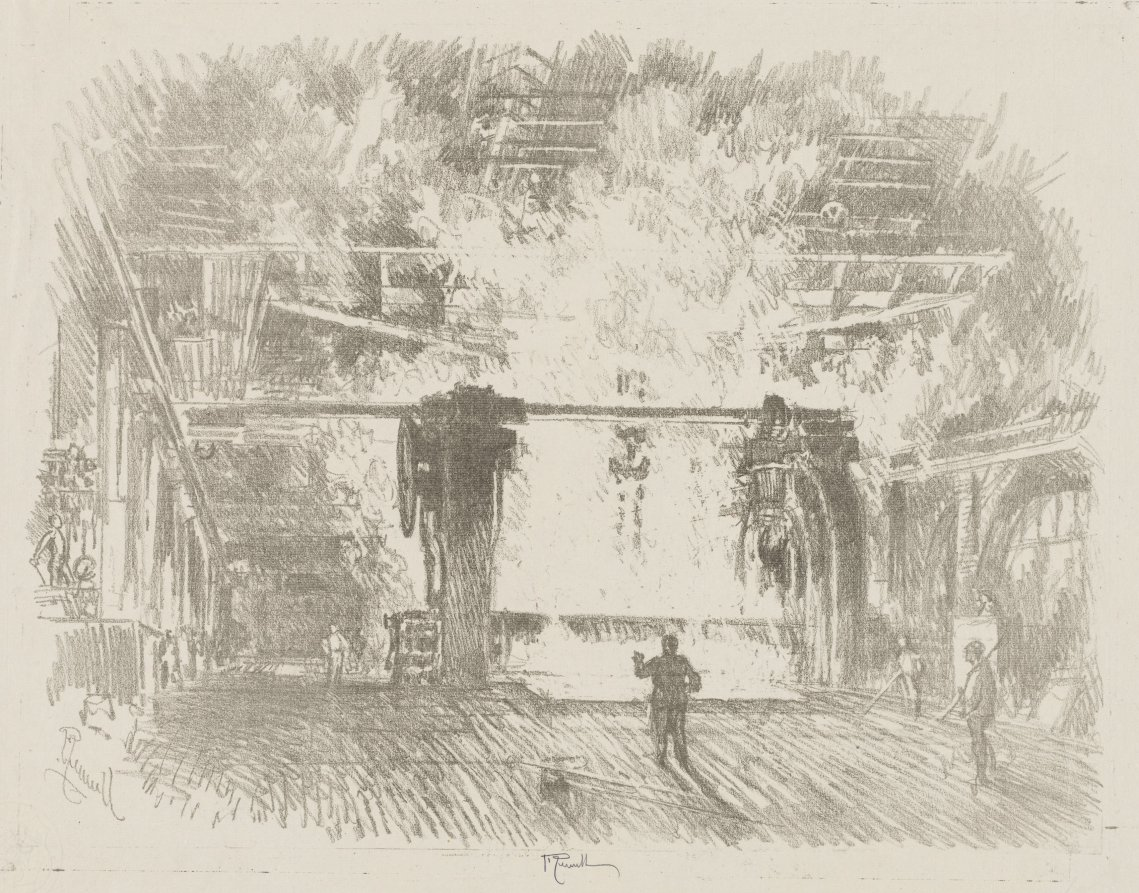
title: English War Work: Making Armour-Plate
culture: America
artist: Joseph Pennell (American, 1857–1926)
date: 1916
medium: lithograph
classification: Print